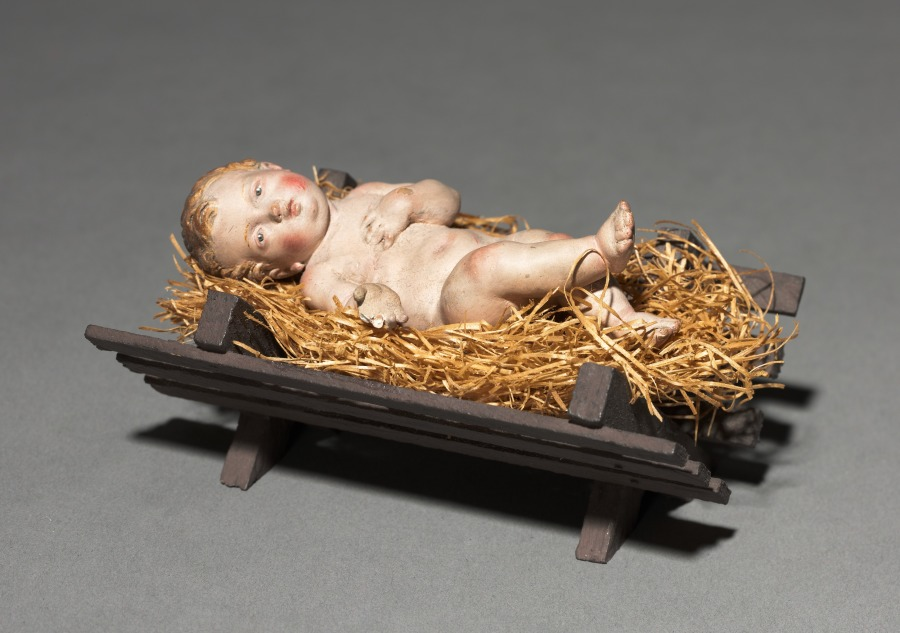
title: Figure from a Crèche: Infant Christ with Crib and Straw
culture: Italy, Naples, late 18th-early 19th century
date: 1780–1830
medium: painted terracotta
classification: Sculpture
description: The practice of creating scenes of the Nativity for the home dates from the early 1700s in Italy, where people began to set up doll-like figures of about a foot or less in height. The custom was particularly popular in Naples around 1800, where crèche scenes (crèche means cradle, or crib) included many figures, whose heads and hands of painted terracotta, stuffed cloth bodies, and clothing adapted from contemporary local costumes gave them an amazingly realistic character. Representations of the birth of Jesus can be traced to the first few centuries of Christianity. Both living creatures and sculptural depictions of them were used from early times. By the late middle ages it was customary to create life-size figures of wood or stone, naturalistically painted, to represent the characters who participated in the events of Jesus's early life. These sculptures were then arranged in scenes illustrating one or both of the most important of these events, the Adoration of the Shepherds and the Adoration of the Magi-the three kings from the East who came to pay homage to the Christ child. Used in churches, these large figures were especially popular in Italy, Central Europe, Spain, and Portugal. This Object in Focus presentation was organized by Henry Hawley, Curator of Renaissance and Later Decorative Arts and Sculpture.